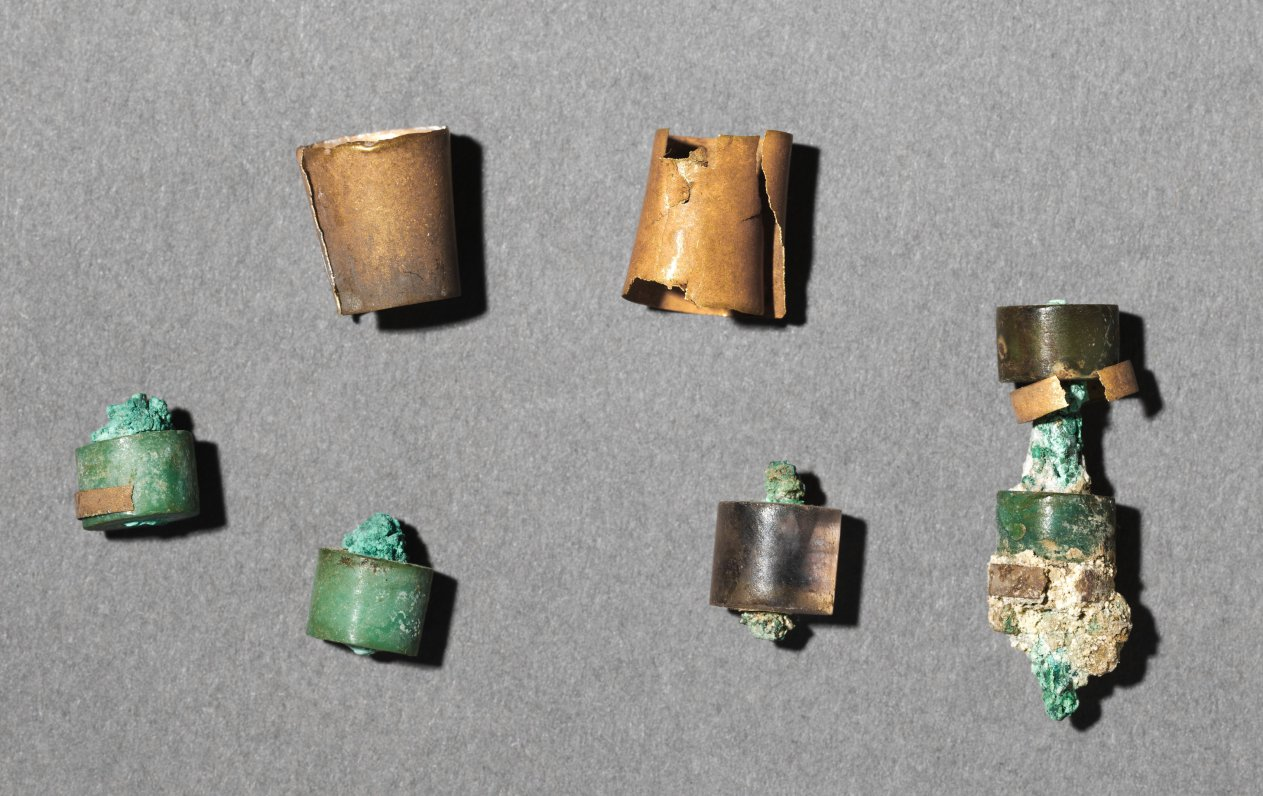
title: Fragments of an Amuletic Cylinder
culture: Egypt, Middle Kingdom (2040–1648 BCE)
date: 2040–1648 BCE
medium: gold, feldspar, and rock crystal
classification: Amulets